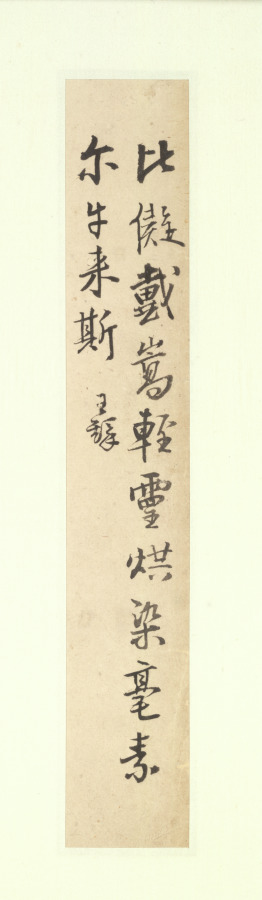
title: Man, Buffalo, and Calf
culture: China, Southern Song dynasty (1127-1279)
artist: Li You (Chinese, active c. 1145)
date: 1145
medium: album leaf; ink and color on silk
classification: Painting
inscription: Artist's inscription: 乙丑歲李祐/椿畫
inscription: 3 seals: 1 of Wu T'ing (c. 1600); 1 of An Kuo (1481–1534); 1 of Li Pao-hsün (1858–1915)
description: Here, a herdboy tending a cow with a calf is sitting beneath a tree with his pet myna bird. The painting can be read as a pastoral scene. As the water buffalo helped plow the fields, it was perceived as an animal that endures hard work without gain for itself, often interpreted as a metaphor for the official. Ox-herding pictures, presented as gifts in court circles, were used for their moral and political rhetoric. The Yijing (Book of Changes) states, The Receptive is the earth, the mother . . . it is a cow with a calf . . . the multitude [in relation to the ruler].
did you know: Li You included such tiny details as circular patterns of hair on the buffalo’s hindquarters.